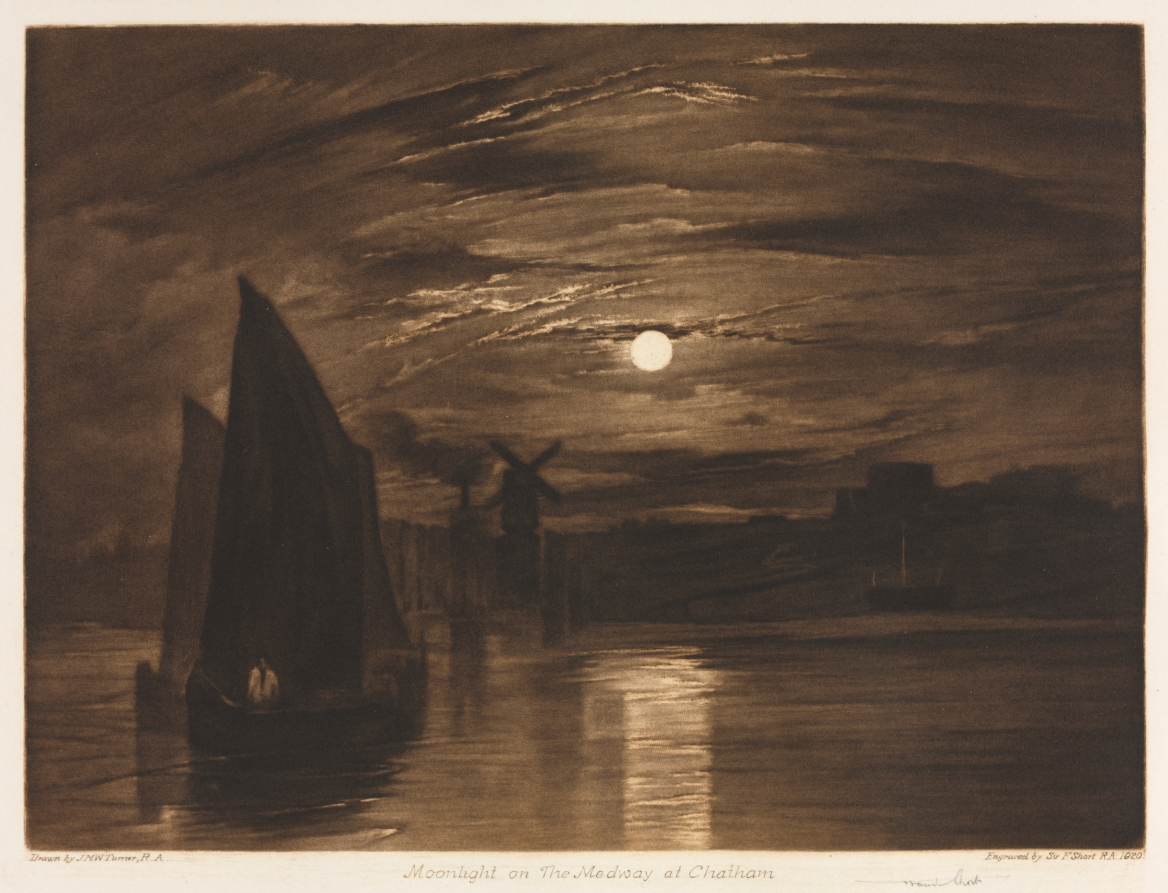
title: Moonlight on the Medway at Chatham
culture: England, 20th century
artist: Frank Short (British, 1857–1945)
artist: after Joseph Mallord William Turner (British, 1775–1851)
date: 1920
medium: mezzotint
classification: Print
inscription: Lower right, in pencil: "Frank Short" Printed below image: "Drawn by JMW Turner, RA Moonlight on the Medway at Chatham Engraved by Sir F. Short, RA 1920"